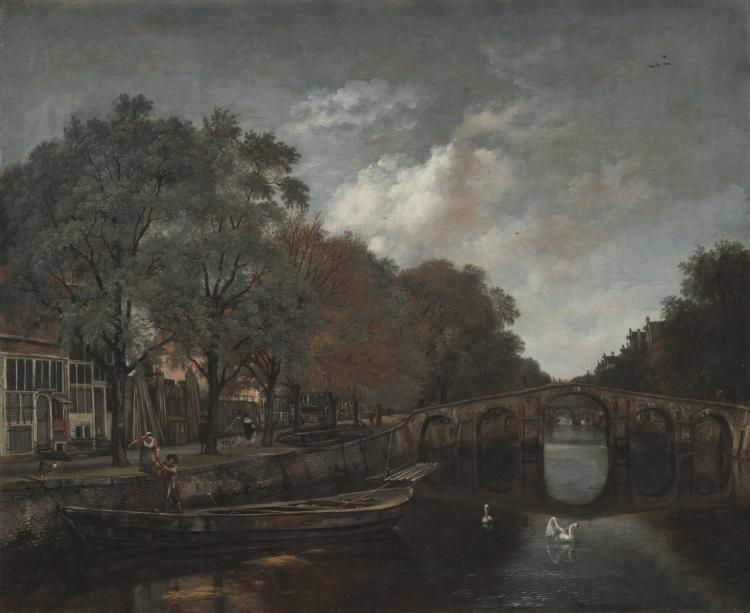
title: Herengracht, Amsterdam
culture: Netherlands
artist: Jan Wijnants (Dutch, 1635–1684)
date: c. 1661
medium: oil on canvas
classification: Painting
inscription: Signed lower left: "J. Wijnants [with remains of an inscription below]"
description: This painting is the first depiction of Amsterdam in which a canal is given prominence. Flanked by picturesque, tree-lined avenues and exquisite mansions, the Herengracht (Gentleman's Canal) was one of Amsterdam's most important waterways. The precision with which Jan Wijnants portrayed the topography of the city enables the viewer to witness the development of this location. To the left of the canal, Wijnants depicted a lumber yard, on which, in 1662, the architect Philip Vingoboons built four houses for the merchant Jacob Cromhout. Furthermore, soon after Wijanants completed this painting the canal was expanded.